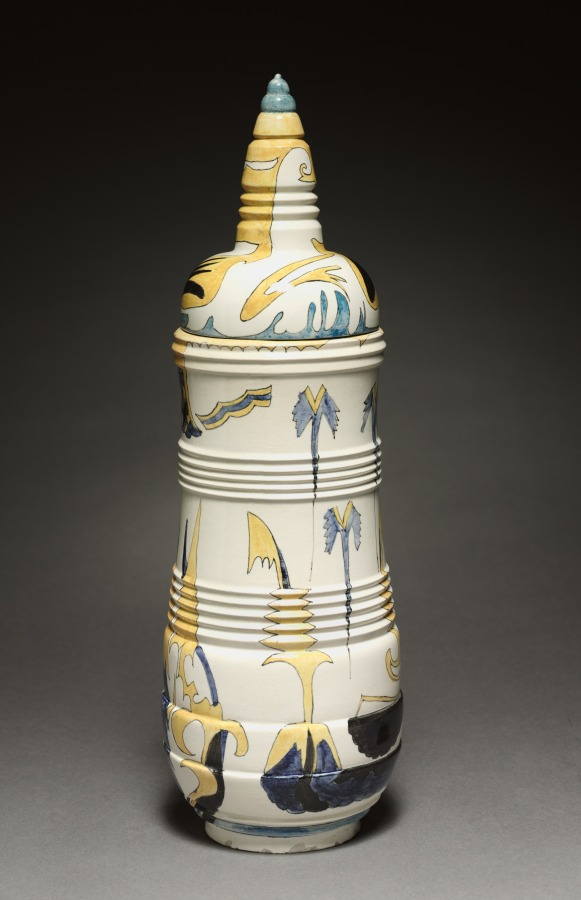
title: Covered Jar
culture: Netherlands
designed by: Theodorus A. C. Colenbrander (Dutch, 1841–1930)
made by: Rozenburg Factory (Netherlandish)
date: 1885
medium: earthenware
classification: Ceramic